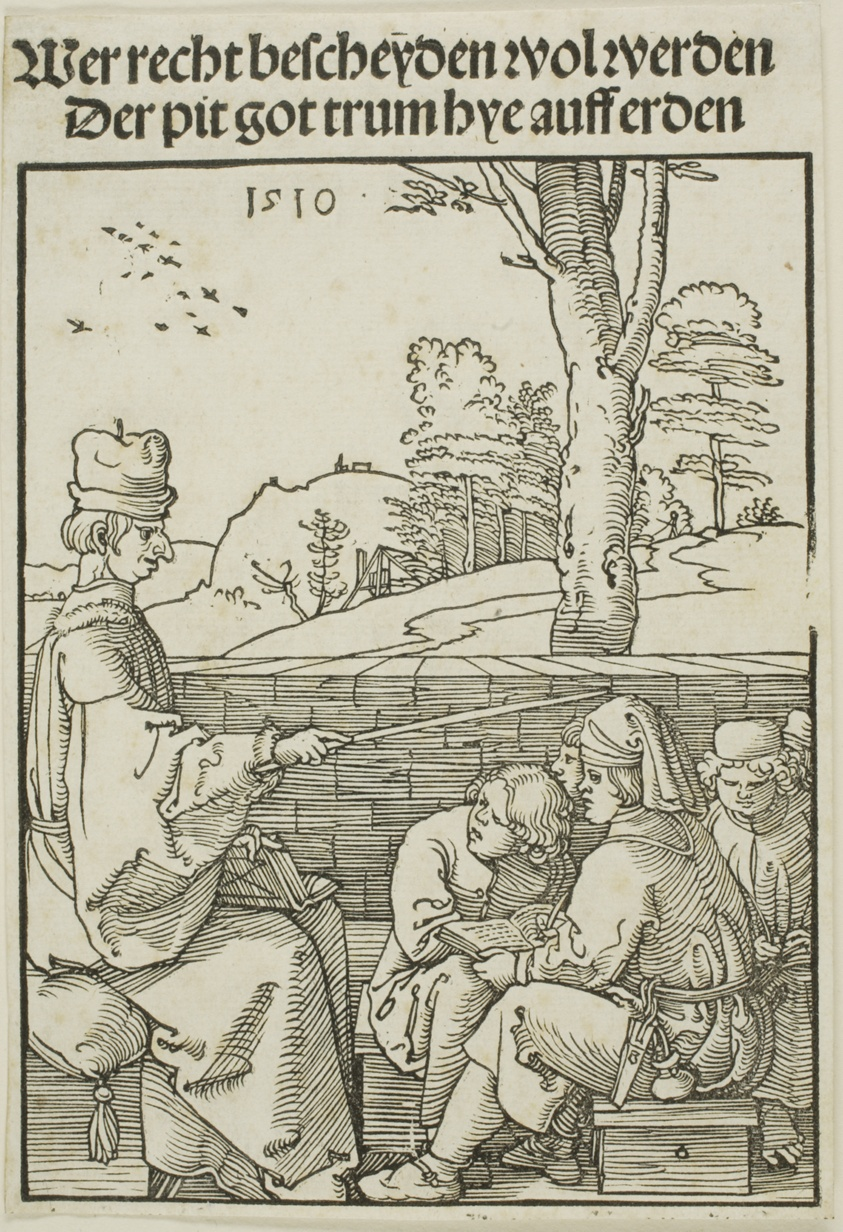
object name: Print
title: The School Teacher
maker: Albrecht Dürer (German, 1471-1528)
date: 1510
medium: Woodcut in black on ivory laid paper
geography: Germany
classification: woodcut; print; prints and drawing; paper